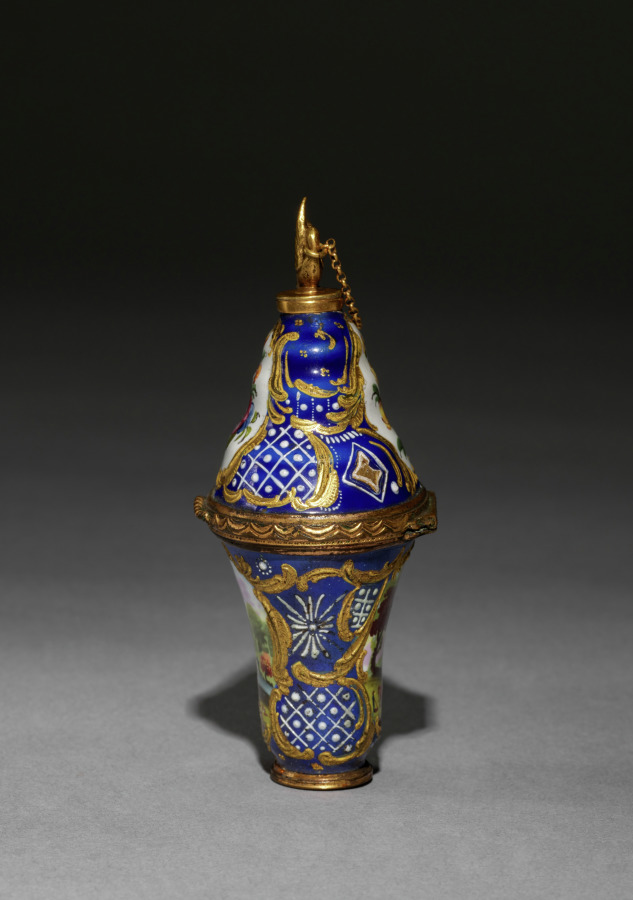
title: Scent Bottle and Box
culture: England, Staffordshire, 18th century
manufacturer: Staffordshire Factory (British)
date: 1750–1775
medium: enamel on copper with metal mounts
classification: Miscellaneous